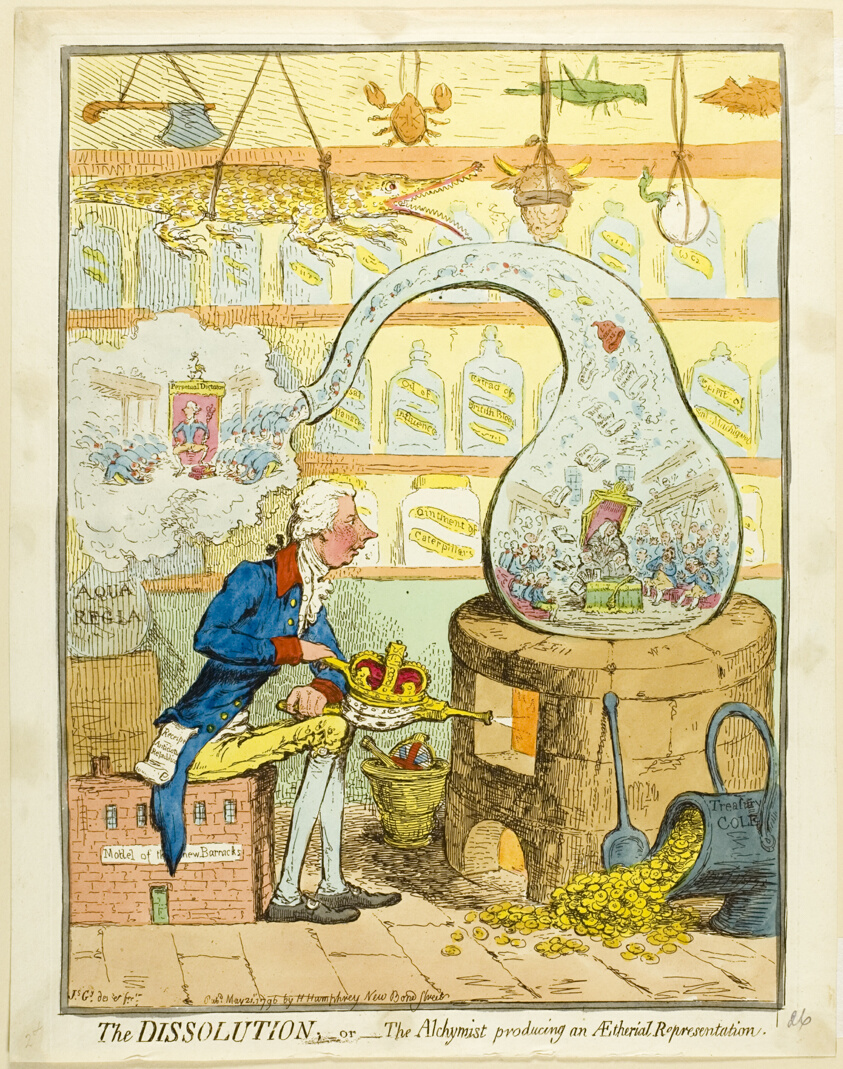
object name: Print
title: The Dissolution; or The Alchymist Producing an Aetherial Representation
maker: James Gillray (English, 1756-1815); published by Hannah Humphrey (English, c. 1745-1818)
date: published May 21, 1796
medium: Etching in dark brown, with handcoloring, on cream wove paper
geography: England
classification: etching; print; prints and drawing